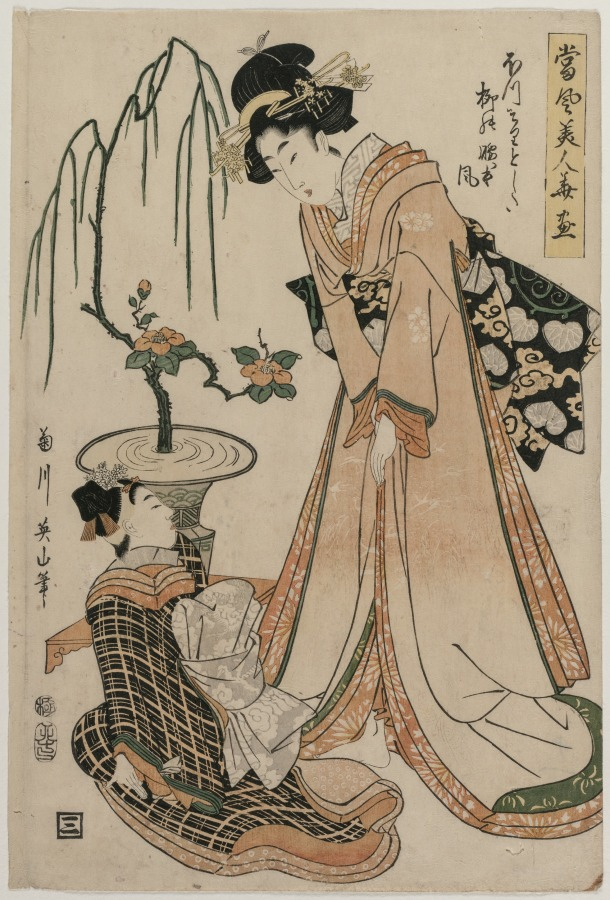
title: A Lady-in-Waiting with Waist as Slender as a Willow from the series Flowers and Modern Beauties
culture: Japan, Edo period (1615–1868)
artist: Kikukawa Eizan (Japanese, 1787–1867)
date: 1807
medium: color woodblock print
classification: Print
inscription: Signature: Kikugawa Eizan hitsu